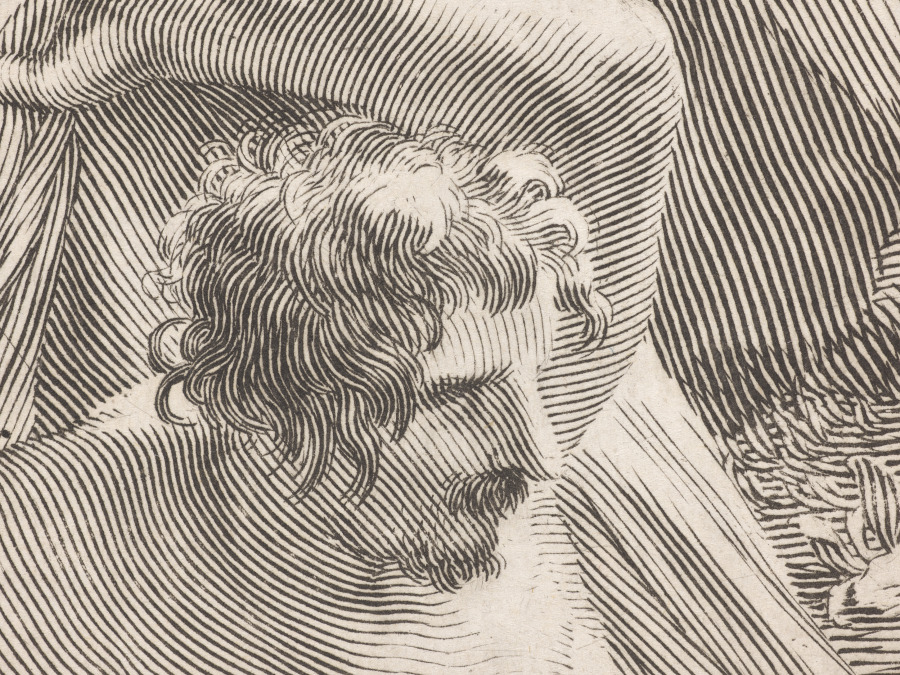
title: Christ Carried to the Tomb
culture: France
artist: Claude Mellan (French, 1598–1688)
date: 1678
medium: engraving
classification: Print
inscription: WATERMARK: bunch of grapes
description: The French engraver Claude Mellan spent time in Rome, where he developed a unique engraving style that uses simplified linear patterns and swelled lines to create optical, almost abstract effects. He created Christ Carried to the Tomb later in his career, when he had fully developed his linear approach to engraving, using swelled lines alone, without the use of crosshatching. The subject of Christ’s burial procession was somewhat unusual among works of the period, and Mellan went further to highlight a lesser-known passage from the biblical book of Matthew in the foreground that describes the resurrection of saints after Christ’s death on the cross. This rather obscure subject matter aligned with Mellan’s emphasis, throughout his career, on presenting engravings that offered something unique and extraordinary to his audience of collectors.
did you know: The foreground figure was portrayed using swelled lines that terminate at the edge of the form, creating the optical illusion of contour lines.